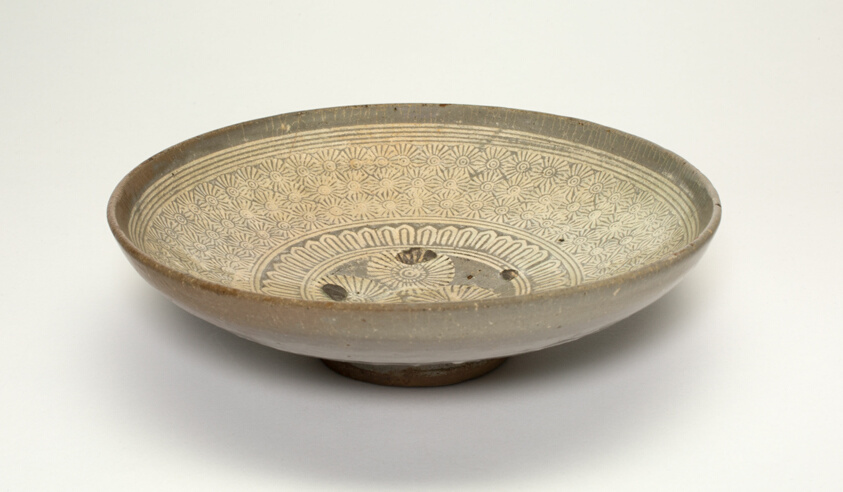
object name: Vessel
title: Dish with Chrysanthemum Motif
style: Korean (culture or style)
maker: Korea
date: Joseon dynasty (1392–1897), 15th century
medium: Stoneware with white slip and glaze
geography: Korea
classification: bowl; dish (vessel); ceramics; asian art; vessel